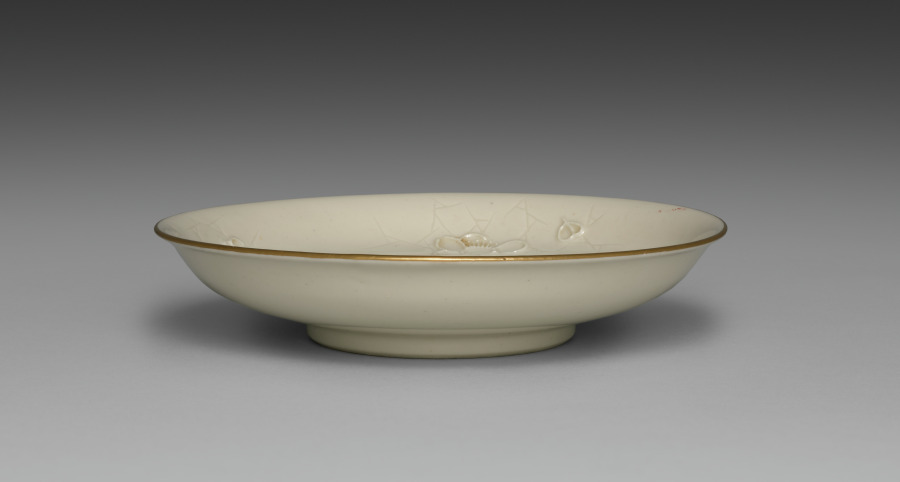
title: Medium-sized Dish from Dining Set with Plum Blossoms and Cracked-Ice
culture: Japan, Meiji period (1868–1912)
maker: Seifū Yohei II (Japanese, 1844–1878)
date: c. 1875–78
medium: Porcelain with molded designs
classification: Ceramic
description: Each item in this set has a delicate low-relief design of flowering plum branches over scattered, intersecting lines meant to resemble the cracked-ice surface of a frozen body of water and is signed on the base in gold pigment. While Yohei II produced many fine works in underglaze blue, like those produced by Kiyomizu Shichibei, he also made works in quite different styles later in his career, from the early 1870 s. In 1873, he was appointed purveyor to the Industrial Center of Kyoto Prefecture, a designation associated with Kyoto’s efforts to reach an international market through the port of Kobe; and from 1875 until his death, he was involved in national-level projects to present Japanese ceramics across the world. It was during this period that Yohei III was apprenticed to Yohei II, and it has been suggested that this set may in fact be an early example of Yohei III’s work, which he signed with his teacher’s name. Decorated with flowers resembling Japanese textile motifs, the set calls to mind the design of Yohei II’s pair of vases with plum blossoms in the Victoria and Albert Museum. Here, the elaborate trees created for a formal public exhibition setting have been translated into the approachable blossoms of the genteel domestic environment. While the designs are consistent across the pieces, each raised flower petal and pistil and each incised line in the ice was done by hand, so the cups, bowls, and dishes are similar yet unique. The bottoms of two boxes once identified the set’s owner, but the information has been deliberately obscured with black ink. However, inscriptions still visible appear to indicate two occasions, once at the end of July 1886 , and once again in June 1916 , when parts of the set were requested from Hokura in Niigata Prefecture. The location corresponds to a neighborhood in the present-day city of Jōetsu. The surname Tsuji 辻 also appears on a paper tag affixed to one of the box cloths. Future research may possibly reveal more about their provenance. A vase by Yohei III in a private collection combines the formal grandeur of the Yohei II vases in the Victoria and Albert Museum with the gentler design of this dining set, placing flowering plum trees against soft, scalloped-edge clouds resembling those in golden screens.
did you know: The dining wares have a creamy white coloration that the four boxes containing them identify as Korean in style.